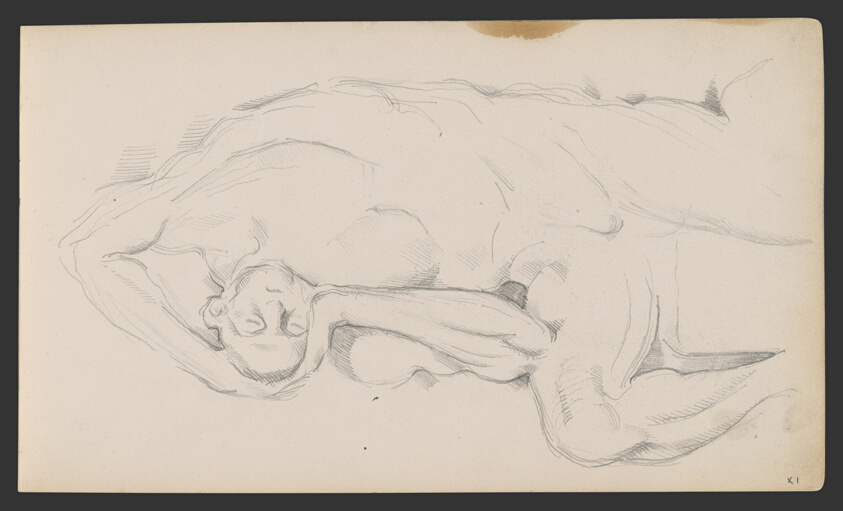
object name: Drawing and Watercolor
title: Sketchbook No. 2 (L'Estaque)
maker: Paul Cézanne; French, 1839-1906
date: 1875–86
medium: Graphite and pen and ink drawings on paper, bound into a book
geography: France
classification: sketchbook; graphite; prints and drawing; paper